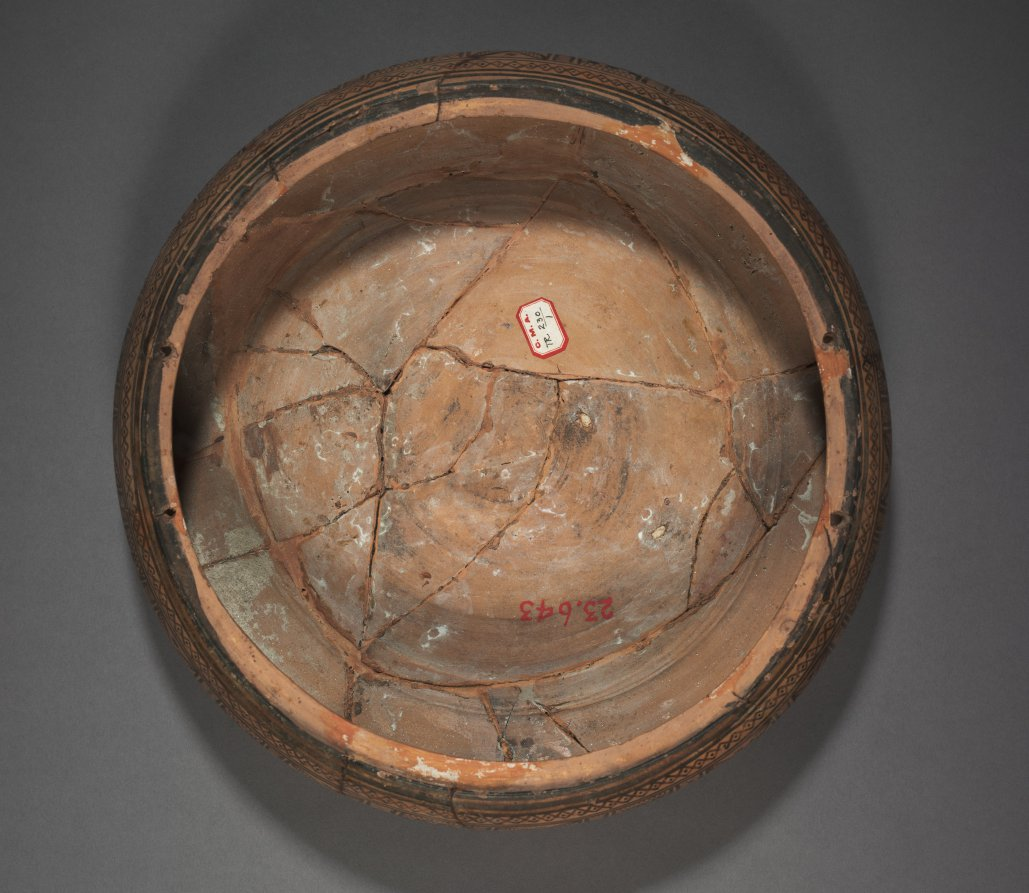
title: Geometric Horse Pyxis (Cylindrical Box)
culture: Greek, Attic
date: c. 760–750 BCE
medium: ceramic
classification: Ceramic